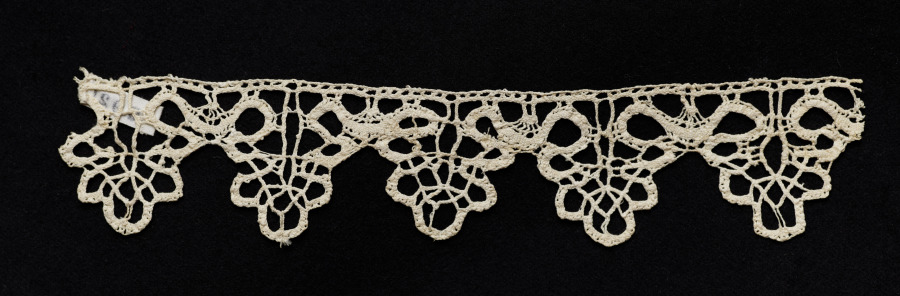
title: Lace Edging with Points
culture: Italy, Venice or Genoa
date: 1600–1620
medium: Bobbin lace (needle lace design)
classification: Lace